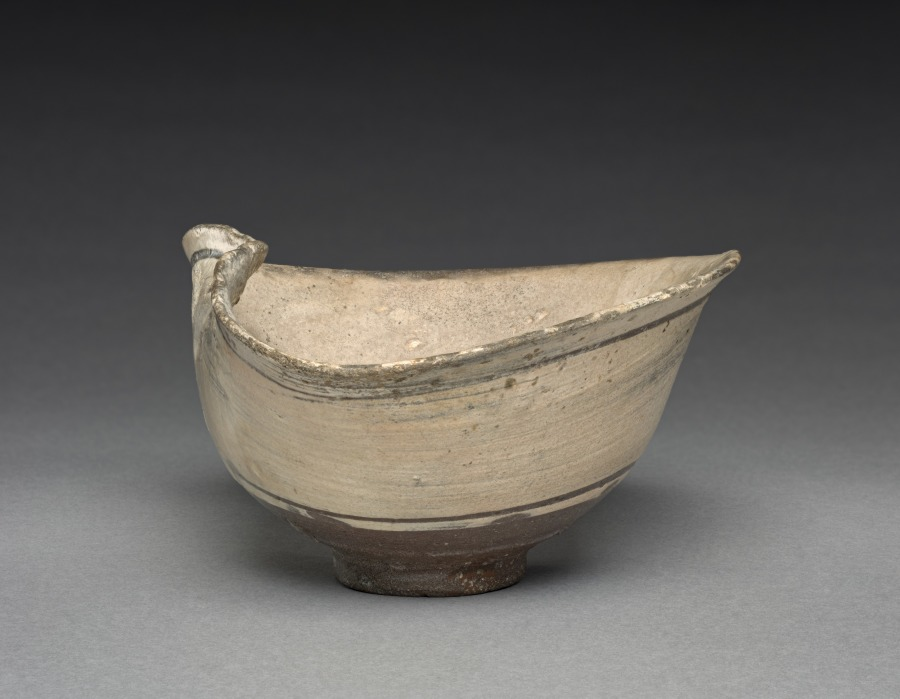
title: Bowl with Brushing Decorations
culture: Korea, Joseon dynasty (1392–1910)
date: 1400s–1500s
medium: Clay, glaze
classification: Ceramic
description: This type of wide-mouthed bowl was used everyday in Korea, not exclusively for tea drinking. But when it was introduced to Japan around the early 1500s, its imperfect appearance evoking the aesthetics of wabi-sabi caused it to be repurposed as a tea bowl. Korean tea bowls were circulated as an item of foreign luxury among Japanese military elites. Many Korean potters were abducted to Japan during the Japanese invasions (1592–98) and some settled down in provinces such as in the Saga prefecture in Kyushu. Dislocated Korean potters are often credited for their leading role in the development of ceramic industry in Japan.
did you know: This type of humble tea bowl was highly praised among Japanese collectors for its imperfect beauty.